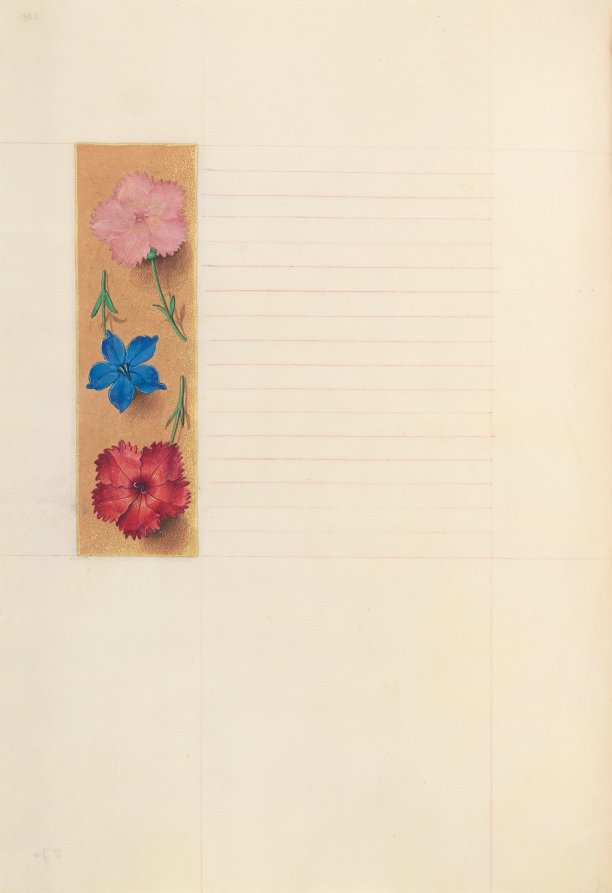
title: Hours of Queen Isabella the Catholic, Queen of Spain: Fol. 275v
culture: Flanders, Ghent and Bruges, late 15th century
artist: Master of the First Prayerbook of Maximillian (Flemish, c. 1444–1519)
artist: and Associates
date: c. 1500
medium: ink, tempera, and gold on vellum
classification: Bound Volume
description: This manuscript was illuminated by a circle of at least five highly organized manuscript painters active in the Flemish cities of Ghent and Bruges. The principal illuminator was Alexander Bening, who painted the majority of the book's miniatures. Manuscripts produced by this circle of artists are renowned for the decoration of their borders, which typically feature a rich variety of realistically-painted flowers, birds, and butterflies. This prayer book, called a book of hours, was intended not for a cleric, but for the private devotions of a lay person-in this case, Isabella the Catholic, Queen of Spain (1451-1504). Isabella's coat of arms embellishes the book's frontispiece. It is unlikely that the book was commissioned by the Queen herself; rather, she probably received it as a diplomatic gift from someone courting her patronage, perhaps Cardinal Francisco Jimenez de Cisneros. A Franciscan friar, Jimenez was dependent upon Isabella for his advancement, first to the post of Queen's confessor in 1492, and then to Archbishop of Toledo in 1495.